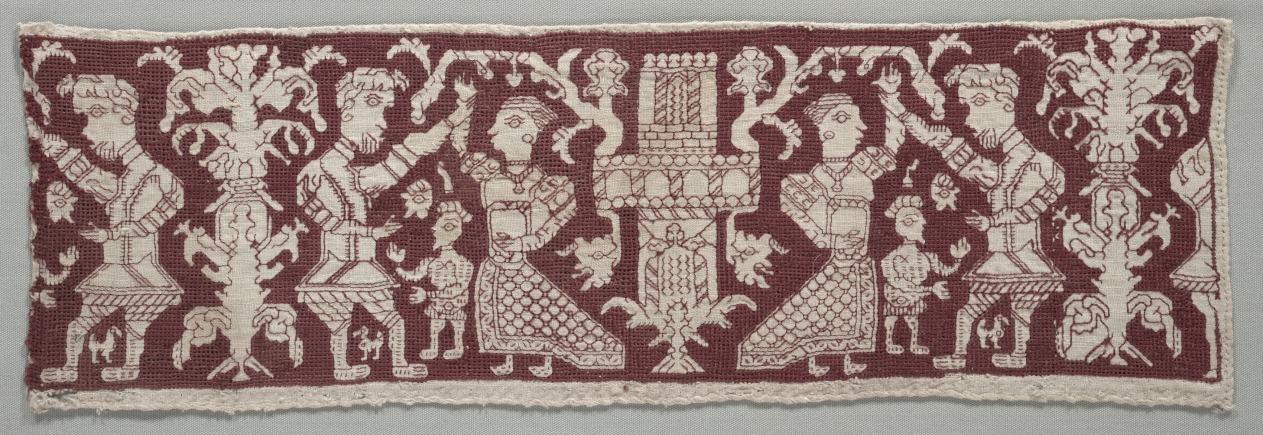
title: Embroidered Strip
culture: Italy, 16th century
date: 1500s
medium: embroidery; silk on linen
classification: Embroidery